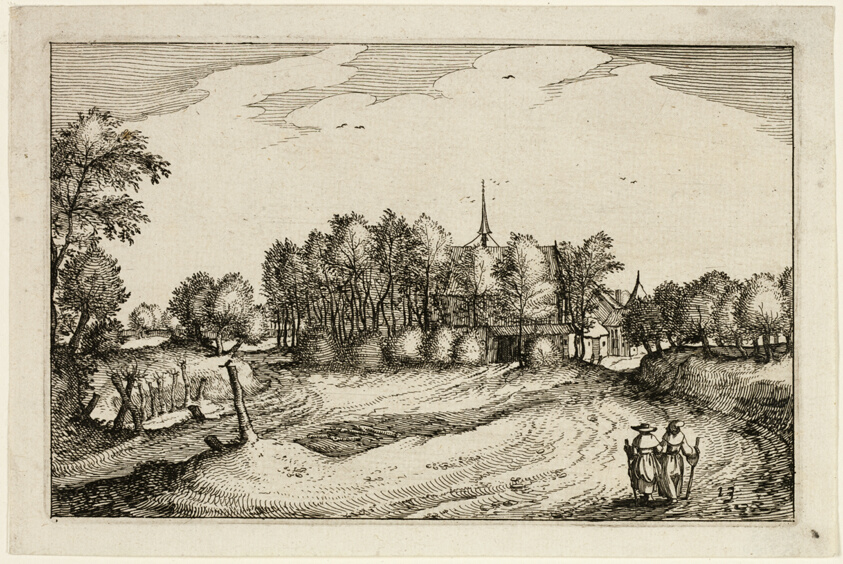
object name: Print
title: A Convent, plate thirteen after Pictures of Farms, Country Houses and Rustic Villages (Praediorum villarum et rusticarum casularum icones)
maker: Claes Jansz. Visscher (Dutch, 1587-1652); after Unknown Flemish Artist, misidentified as Pieter Bruegel, the elder (Flemish, 1525/30-1569)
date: 1612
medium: Etching in black on ivory laid paper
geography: Netherlands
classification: etching; print; prints and drawing